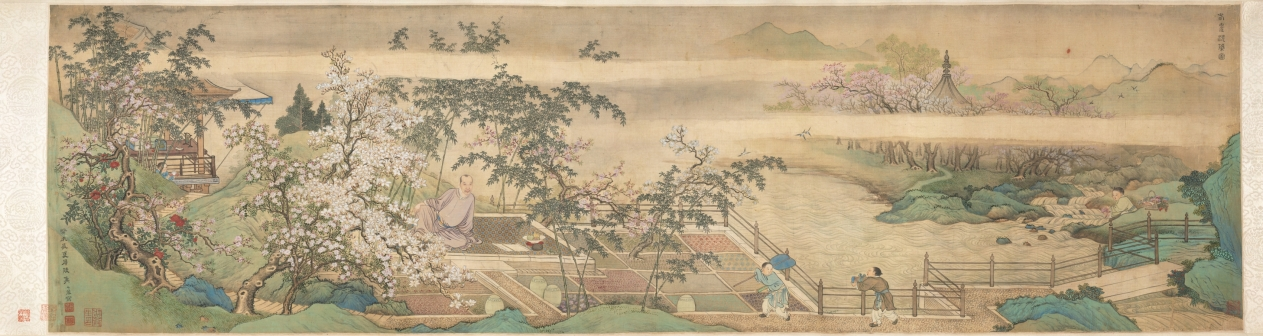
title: Cleansing Medicinal Herbs in the Stream on a Spring Day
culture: China, Qing dynasty (1644-1911)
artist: Yu Zhiding (Chinese, 1647–c. 1716)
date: 1703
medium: Handscroll; ink and color on silk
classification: Painting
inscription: Title by Chen Yixi.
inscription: 姑射仙人冰雪膚，新詩傳唱滿通都。/ 極知遲暮難為別，更展春泉洗藥圖。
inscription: Colophon by Chen Tingjing 陳廷敬 (1639–1712). Colophon by Wang Hongxu 王鴻緒 (1645–1723), dated 1707. Colophon by Song Luo 宋犖 (1634–1714). Colophon by Liu Yan 劉巗. Colophon by Jing Xikui 涇西夔. Colophon by Liu Yan 劉巗. Colophon by Cao Yin 曹寅. Colophon by Wang Shihong 汪士鋐. Colophon by Wang Shidan 王式丹 (1645–1718), dated 1712. Colophon by Shi Shenyi 史申義 (1661–1712), dated 1712. Colophon by Yin Yuqing 殷餘慶, dated 1712.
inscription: Colophon by Chen Shixia 陳時夏, dated 1729.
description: A famous portraitist, Yu Zhiding here depicts the likeness of Shi Shenyi 史申義 (1661–1712), an official and poet. Master Shi, a sickly man, was deeply interested in medicinal science. The opening section of the scroll features a boy washing a fungus in fresh spring water, a basket of medicinal herbs by his side. Other servants carry a fan, a bundle of scrolls, and a cup of tea or hot wine. Master Shi sits in a bamboo grove, surrounded by fields of herbs. Returning swallows, pink peach blossoms, and blooming magnolia indicate spring, whereas the fungus conveys wishes for long life. The spring theme may express the artist’s wish for his friend’s recovery.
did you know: In the pavilion are some of Shi Shenyi’s scholarly accoutrements: a stack of books, an antique zun 尊 (wine vessel), a brush holder, an ink stone, and a small chime.